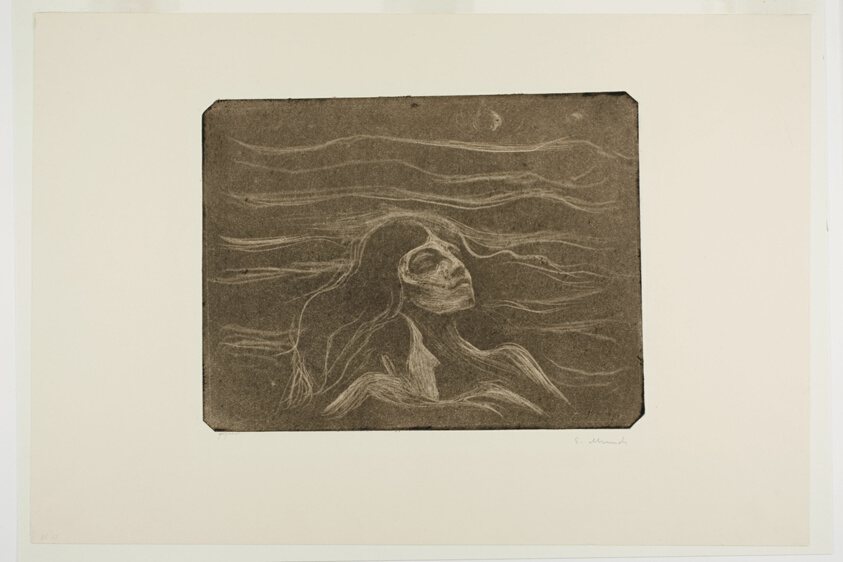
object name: Print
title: On the Waves of Love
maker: Edvard Munch (Norwegian, 1863-1944); printed by Otto Felsing (German, born 1854)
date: 1896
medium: Burnished aquatint and drypoint on heavy wove, cream paper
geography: Norway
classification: etching; print; prints and drawing